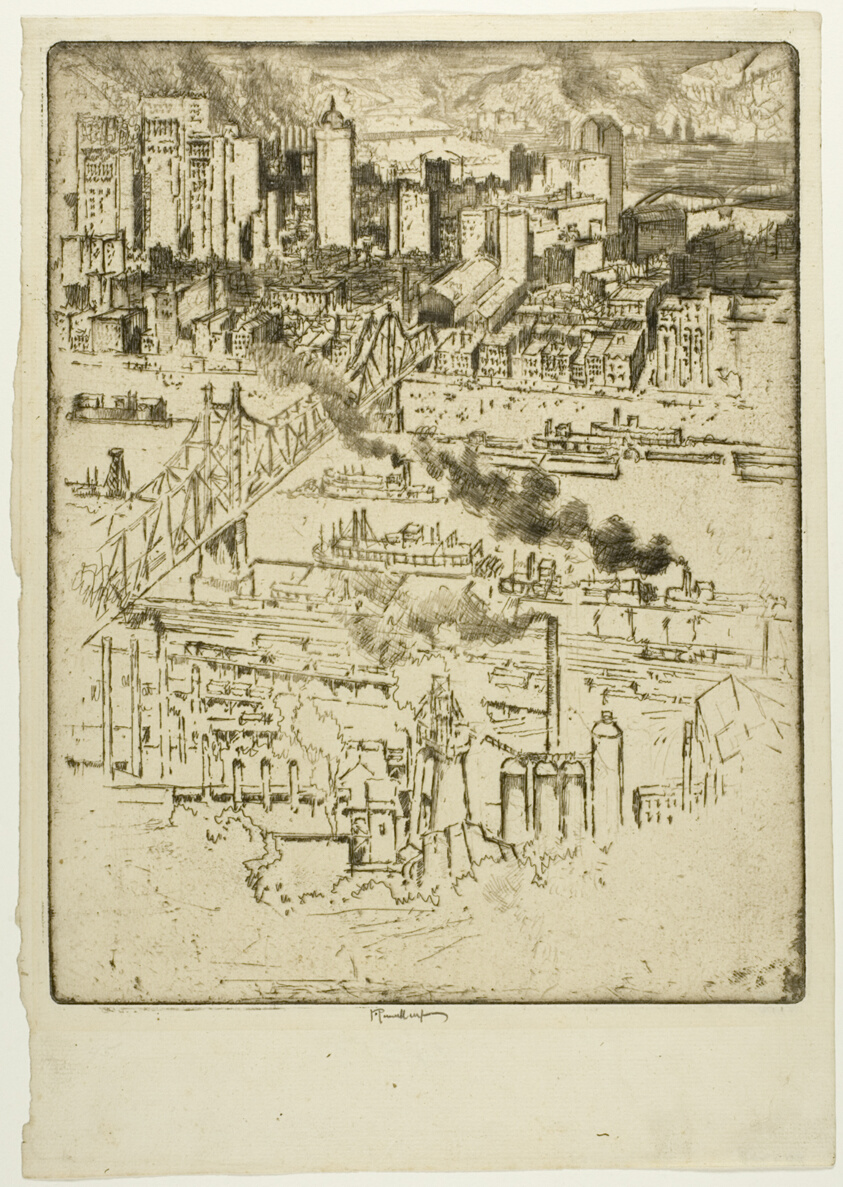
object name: Print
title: Railway Station, Pittsburgh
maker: Joseph Pennell (American, 1857-1926)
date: 1909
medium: Etching on ivory laid paper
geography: United States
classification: etching; print; prints and drawing